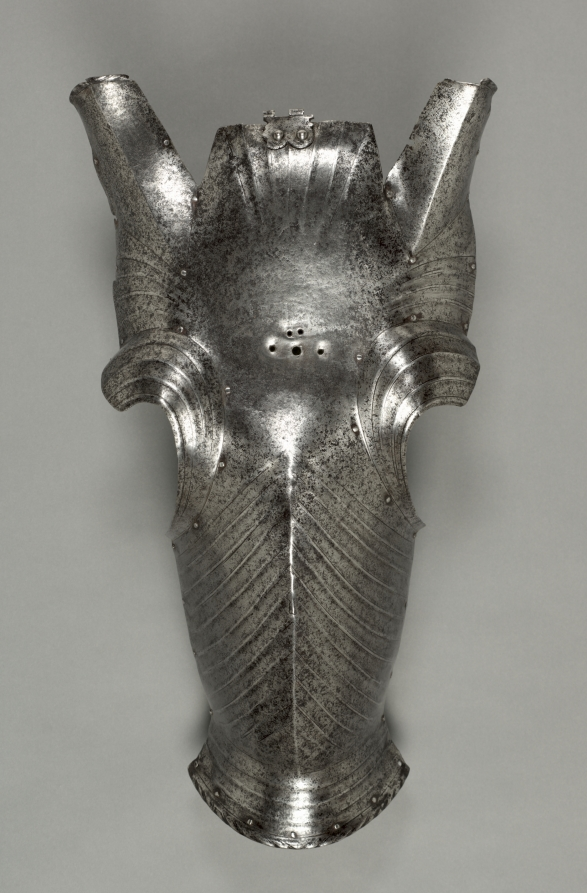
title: Chanfron in Maximilian Style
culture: Germany, Nuremberg (?), early 16th Century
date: c. 1510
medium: steel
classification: Arms and Armor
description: The chanfron was the primary element that protected and decorated a horse's forehead and face. It consisted of a plate of steel contoured to the horse's head from its ears to its nostrils. Normally, two holes were cut at each side of the forehead for the ears, and earpieces were sometimes riveted around their edges. This example, however, was forged in one piece. It belongs to the transitional period between the Gothic and the fluted armors introduced by Emperor Maximilian. The hinge at the top is for the attachment of the crest plate.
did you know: Nuremberg was a chief armor production center and gained international renown; products from here were exported throughout Europe.